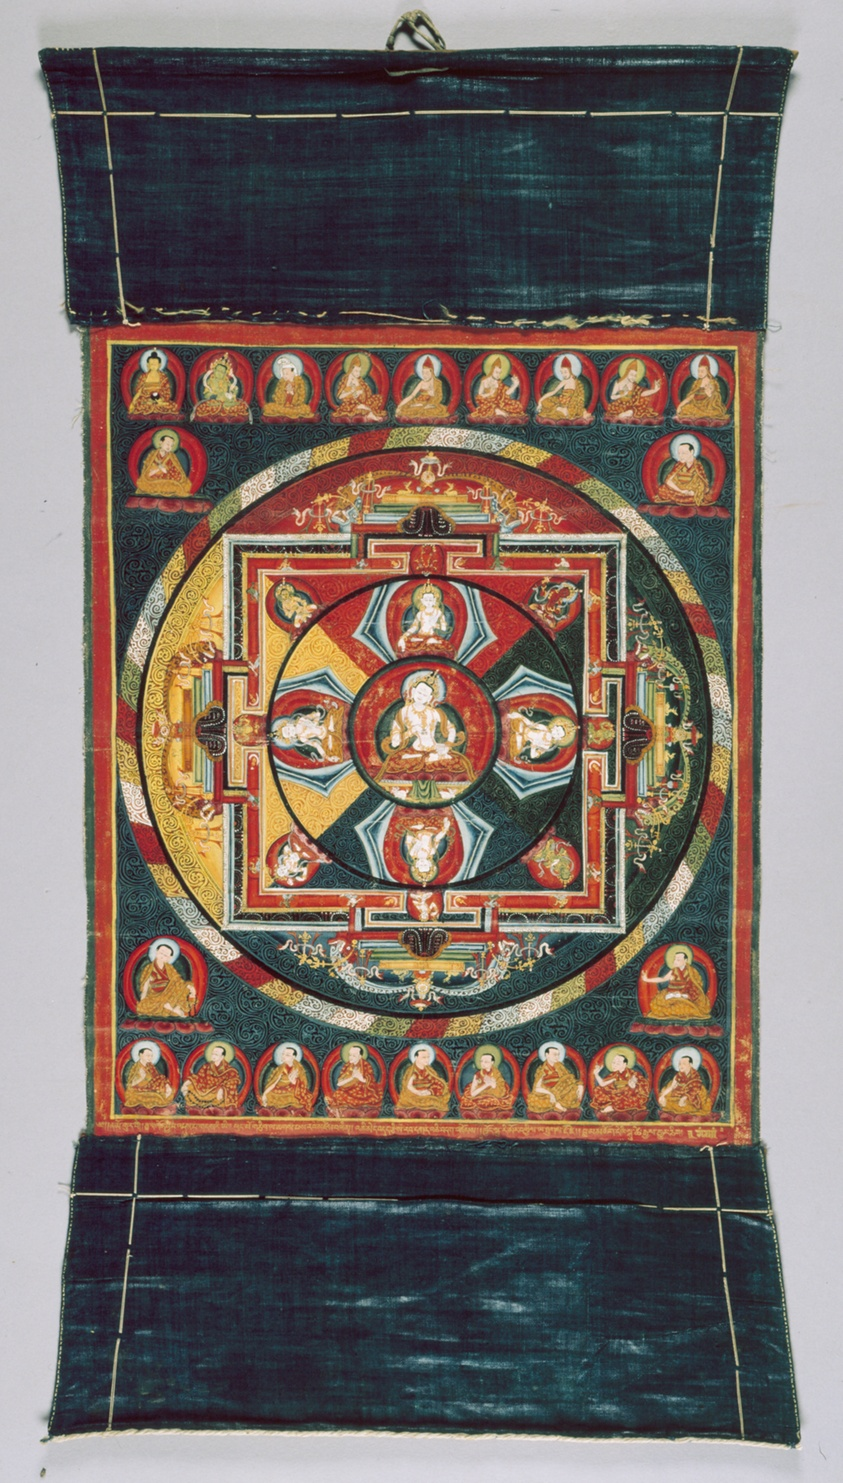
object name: Painting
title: Painted Banner (Thangka) of Vajrasattva Mandala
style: Himalayan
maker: Tibet; Ü-Tsang Province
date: 15th century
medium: Pigment on cloth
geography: Tibet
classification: painting; asian art